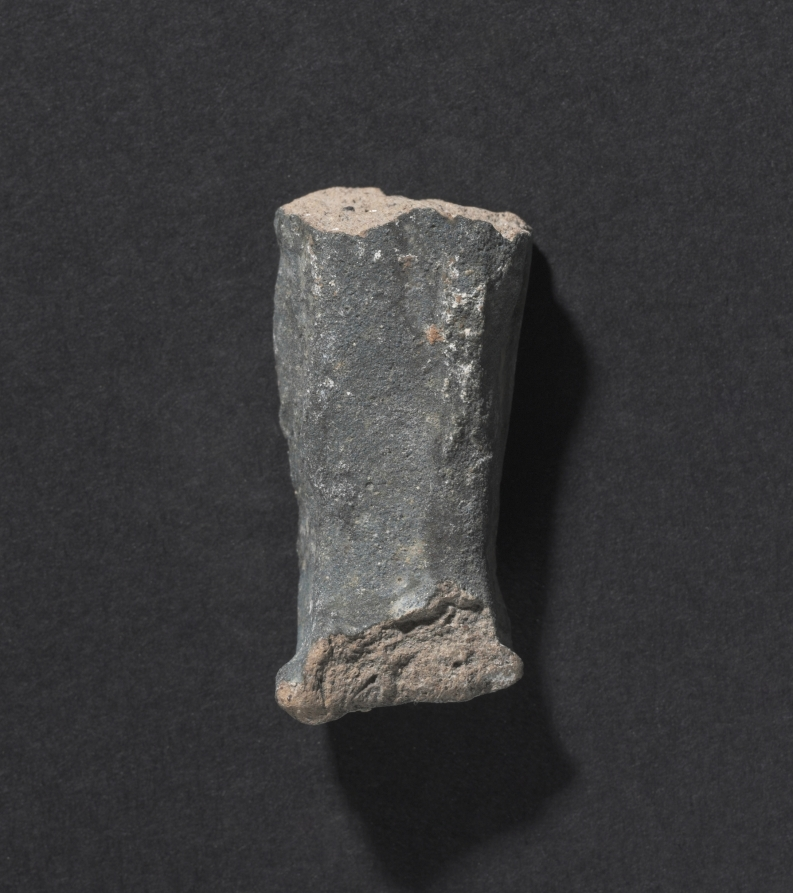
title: Shawabty of Ditamenpaankh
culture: Egypt, Late period (715–332 BCE), Dynasty 25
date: 715–656 BCE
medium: terracotta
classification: Funerary Equipment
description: High demand for shawabtys in the Late Period, a time when as many as 400 or more shawabtys were placed in the tomb with the deceased, gave rise to a specialized container for storing them: the shawabty box. This example is inscribed for the lady of the house, Ditamenpaankh, and was probably one of a pair originally made for her. The single-masted boat on the box's lid is perhaps an allusion to the pilgrimage of the deceased to the holy city of Abydos, the cult city of Osiris, king of the dead. The shawabtys inside are crude, mass-produced examples cast in an open mold. Made of terracotta, their blue paint imitates more costly shawabtys made of faience. As for the shawabty spell, it has been removed from its traditional location on the shawabty's front and relocated onto the sides of box, where it needed only to be written once, thus expediting production.